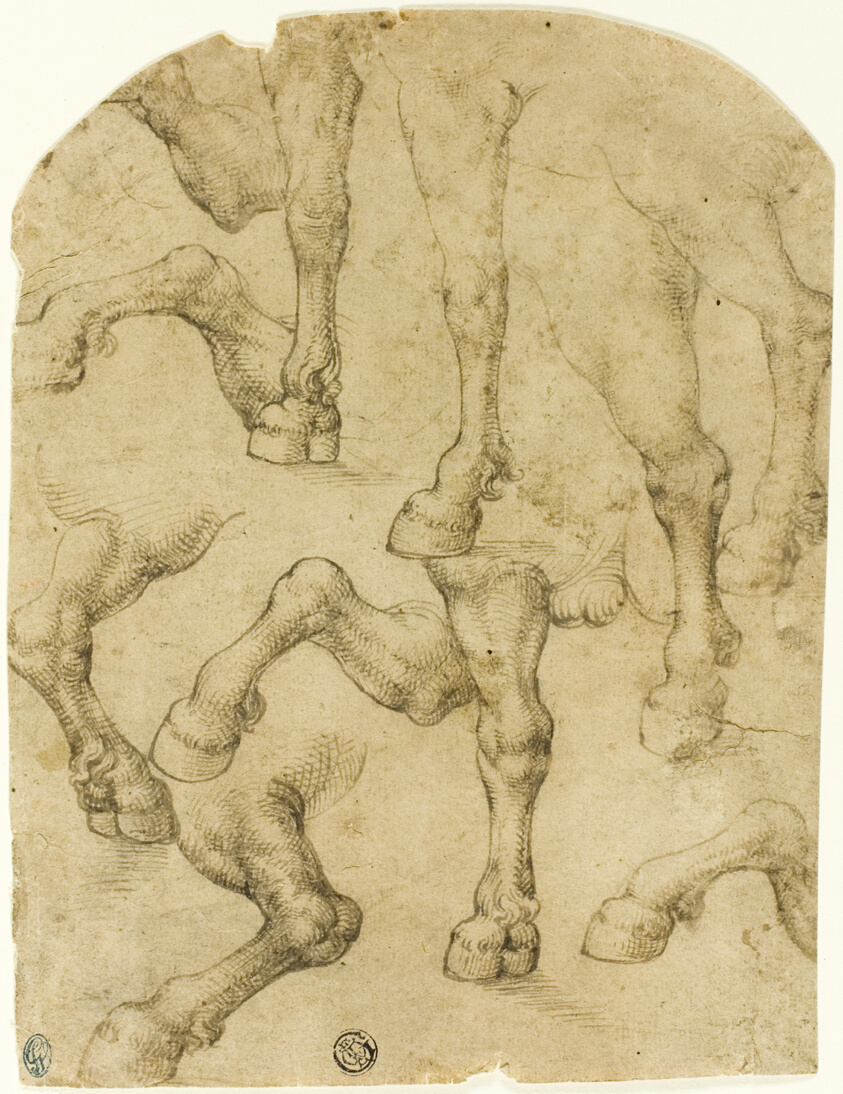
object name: Drawing and Watercolor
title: Sketches of Horses' (or Dromedaries') Legs (recto); Columns (verso)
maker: Follower of Leonardo da Vinci (Italian, 1452-1519)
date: c. 1530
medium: Pen and brown ink (recto), and black chalk (verso) on tan laid paper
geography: Italy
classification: pen and ink drawings; drawings (visual works); prints and drawing